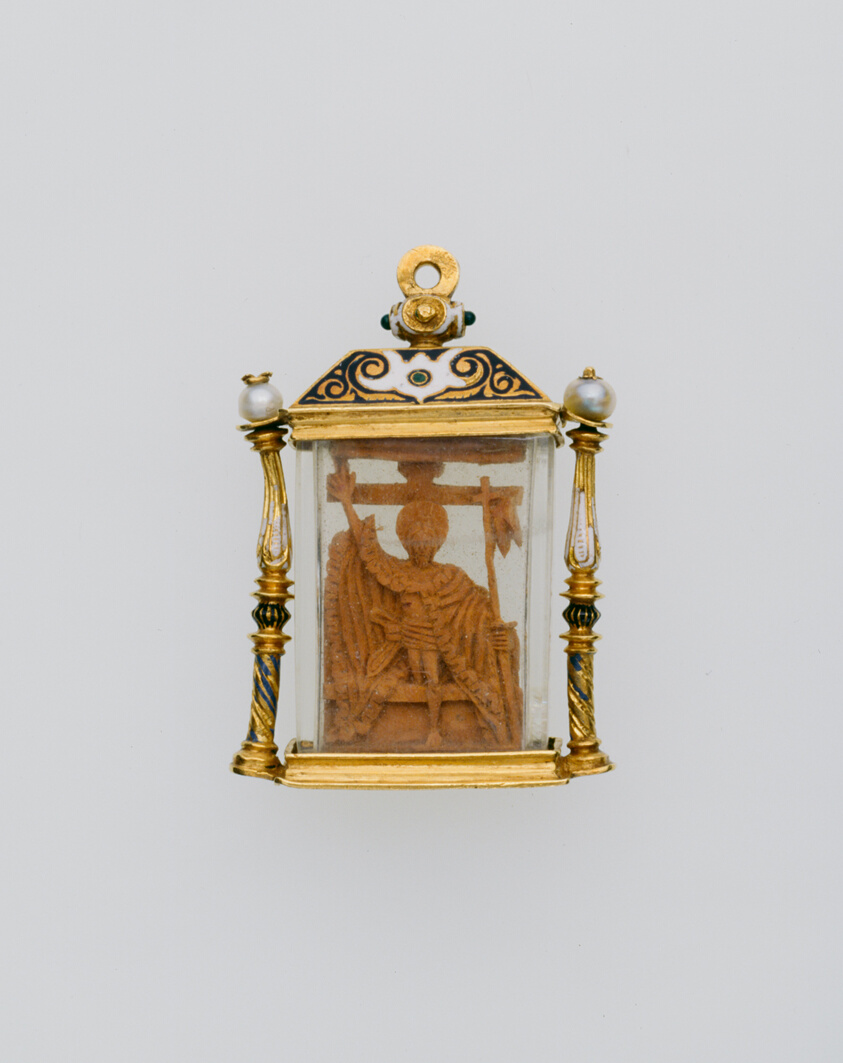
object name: Costume and Accessories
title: Double-Sided Pendant with the Deposition and the Resurrection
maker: Spanish or Spanish Colonial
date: 16th century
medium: Gold, enamel, pearls, rock crystal, and wood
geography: Spain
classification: pendant (jewelry); jewelry; european decorative arts; costume